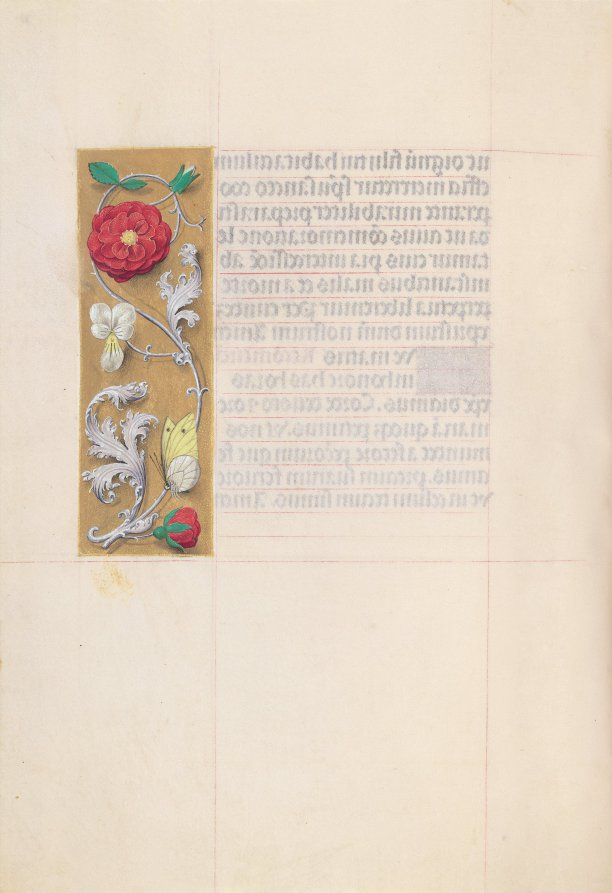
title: Hours of Queen Isabella the Catholic, Queen of Spain: Fol. 86v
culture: Flanders, Ghent and Bruges, late 15th century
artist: Master of the First Prayerbook of Maximillian (Flemish, c. 1444–1519)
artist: and Associates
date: c. 1500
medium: ink, tempera, and gold on vellum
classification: Bound Volume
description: This manuscript was illuminated by a circle of at least five highly organized manuscript painters active in the Flemish cities of Ghent and Bruges. The principal illuminator was Alexander Bening, who painted the majority of the book's miniatures. Manuscripts produced by this circle of artists are renowned for the decoration of their borders, which typically feature a rich variety of realistically-painted flowers, birds, and butterflies. This prayer book, called a book of hours, was intended not for a cleric, but for the private devotions of a lay person-in this case, Isabella the Catholic, Queen of Spain (1451-1504). Isabella's coat of arms embellishes the book's frontispiece. It is unlikely that the book was commissioned by the Queen herself; rather, she probably received it as a diplomatic gift from someone courting her patronage, perhaps Cardinal Francisco Jimenez de Cisneros. A Franciscan friar, Jimenez was dependent upon Isabella for his advancement, first to the post of Queen's confessor in 1492, and then to Archbishop of Toledo in 1495.